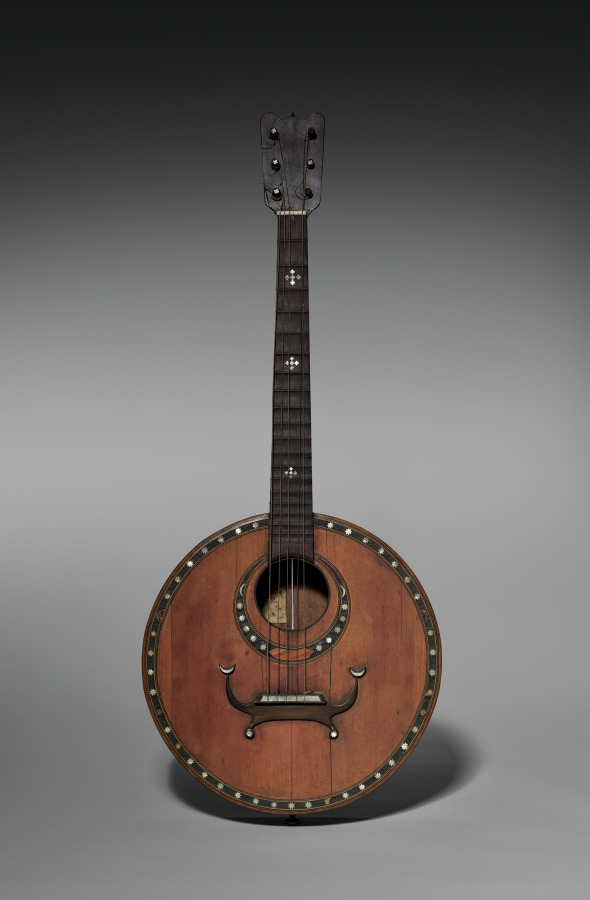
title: Guitar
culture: Italy, 19th century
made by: probably by Fernando Theze (Italian)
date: c. 1860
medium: wood, ebonized wood, mother of pearl inlay, resin, bone?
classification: Musical Instrument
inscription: label inside reads: "Faite a Turin par F. Theze--Amateur."